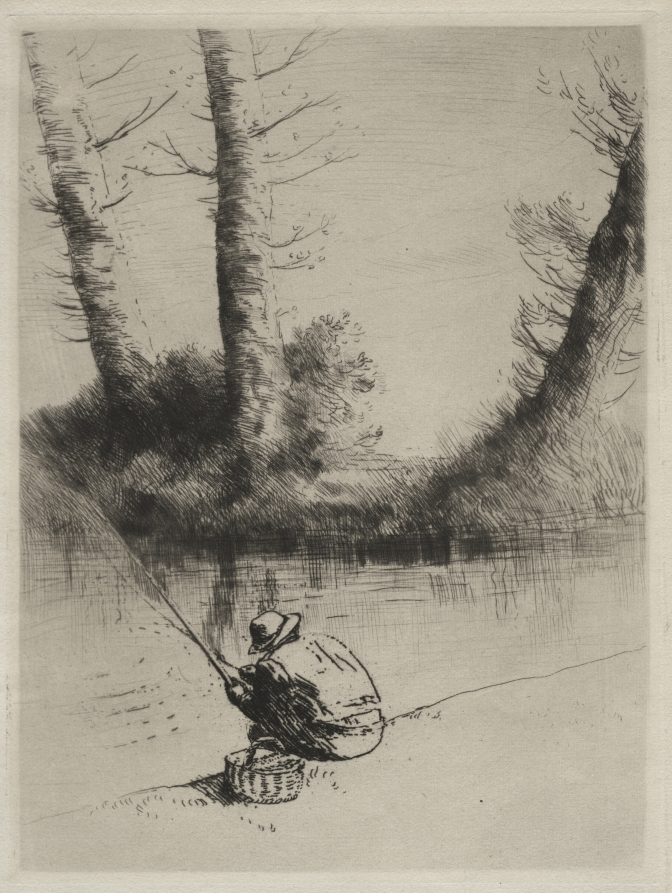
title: Le Pêcheur à la Ligne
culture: France, 19th century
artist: Alphonse Legros (French, 1837–1911)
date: c. 1857–1911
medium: etching and drypoint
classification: Print